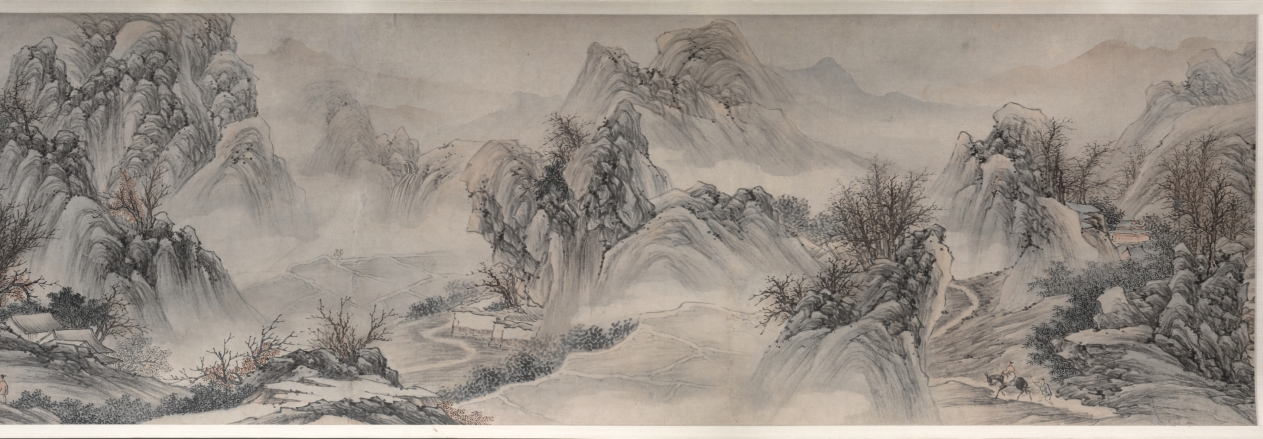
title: Autumn Mist in the Countryside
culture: China, Qing dynasty (1644-1911)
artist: Zou Zhe (Chinese, c. 1610-before 1688)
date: 1647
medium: handscroll, ink and color on paper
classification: Painting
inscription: Artist's inscription, signature, and seal: The first day of the sixth lunar month, the ting-hai year [1647], Tsou Che painted [this]. [seal] Fang-lu.